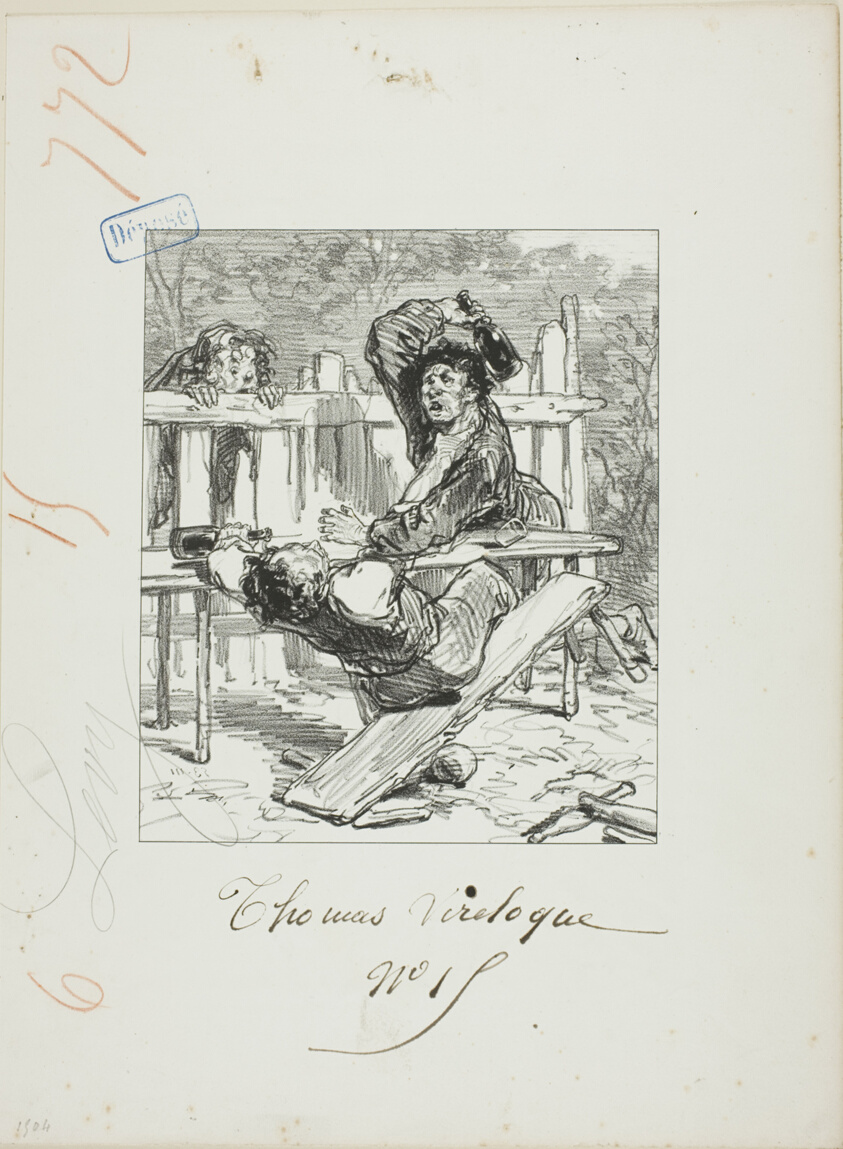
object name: Print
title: Les Propos de Thomas Vireloque: Brains cracked-but bottles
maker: Paul Gavarni (French, 1804-1866)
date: 1853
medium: Lithograph in black on cream wove paper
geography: France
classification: lithograph; print; prints and drawing